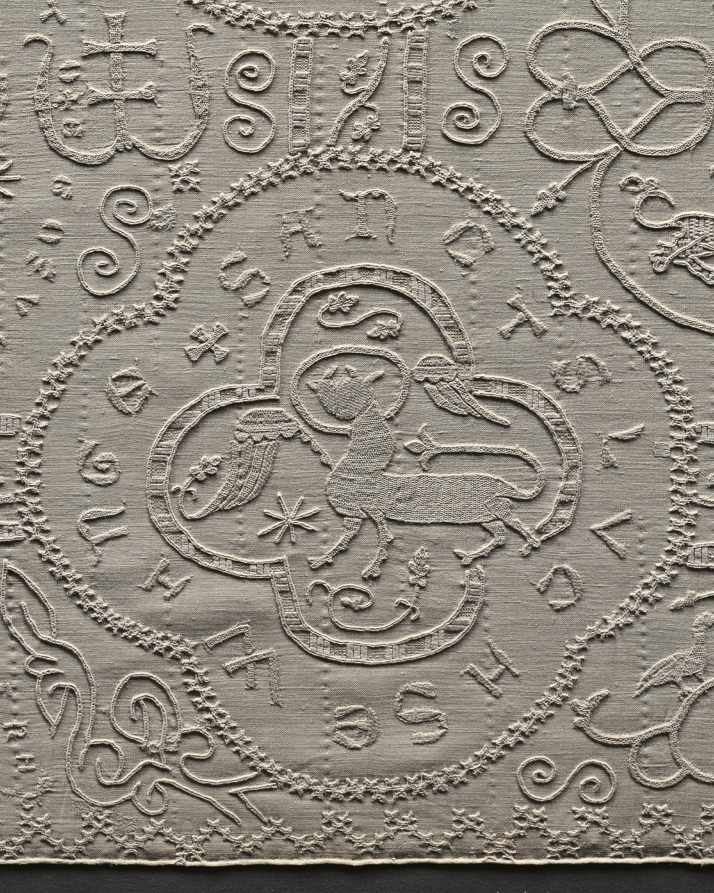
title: Altar Cloth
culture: Germany, Altenberg on the Lahn, Premonstratensian Convent, 14th century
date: c. 1350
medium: embroidery: linen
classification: Embroidery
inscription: various motifs enclosed in quatrefoils with identifying inscriptions in Gothic letters.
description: This large, embroidered altar cloth is one of the rarest, most important medieval church furnishings in existence. It was stitched by nuns in the Premonstratensian Convent in Altenberg on the Lahn River, north of Frankfurt, Germany, and was used to cover the church’s high altar in the weeks leading up to Easter. The cloth is an example of linen embroidery, a specialty of German nuns in the later Middle Ages. The Altenberg monastery church once had valuable furnishings; the high altar retable (a decorated frame with sculptures and paintings on the top of an altar) has survived, the main parts of which are now in the Städel Museum in Frankfurt, Germany.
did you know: When lit from behind, the previously hidden details emerge and the complex design becomes evident.